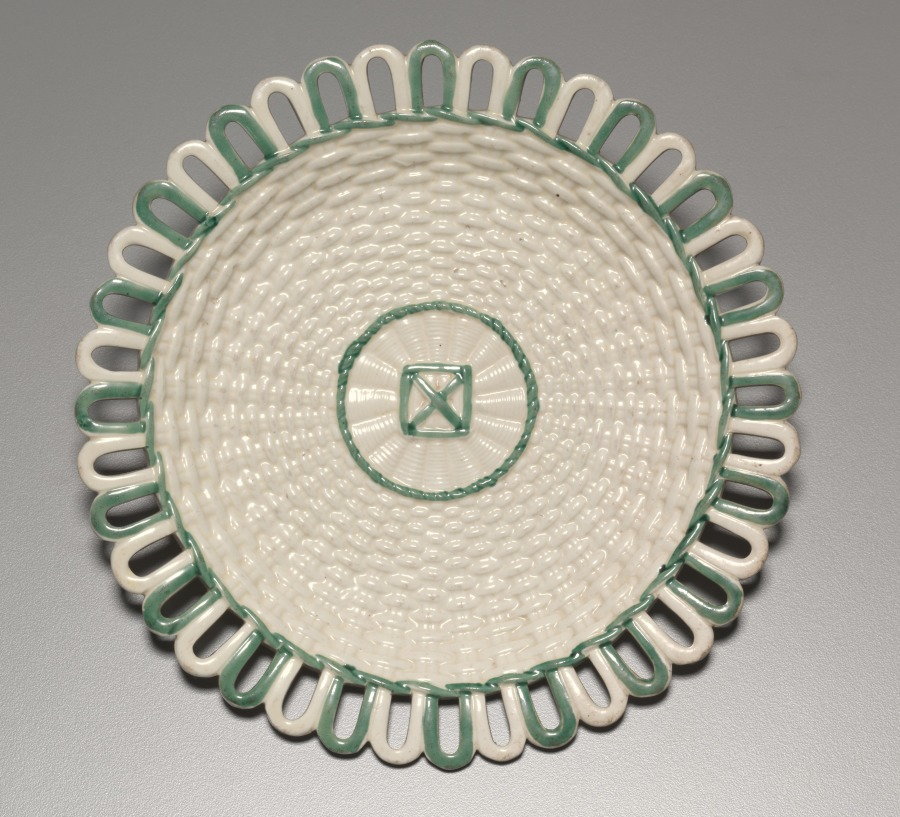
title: Stand for a Sauce Tureen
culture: England, 18th-19th century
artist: Wedgwood Factory (British)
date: c. 1780–1840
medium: earthenware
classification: Ceramic